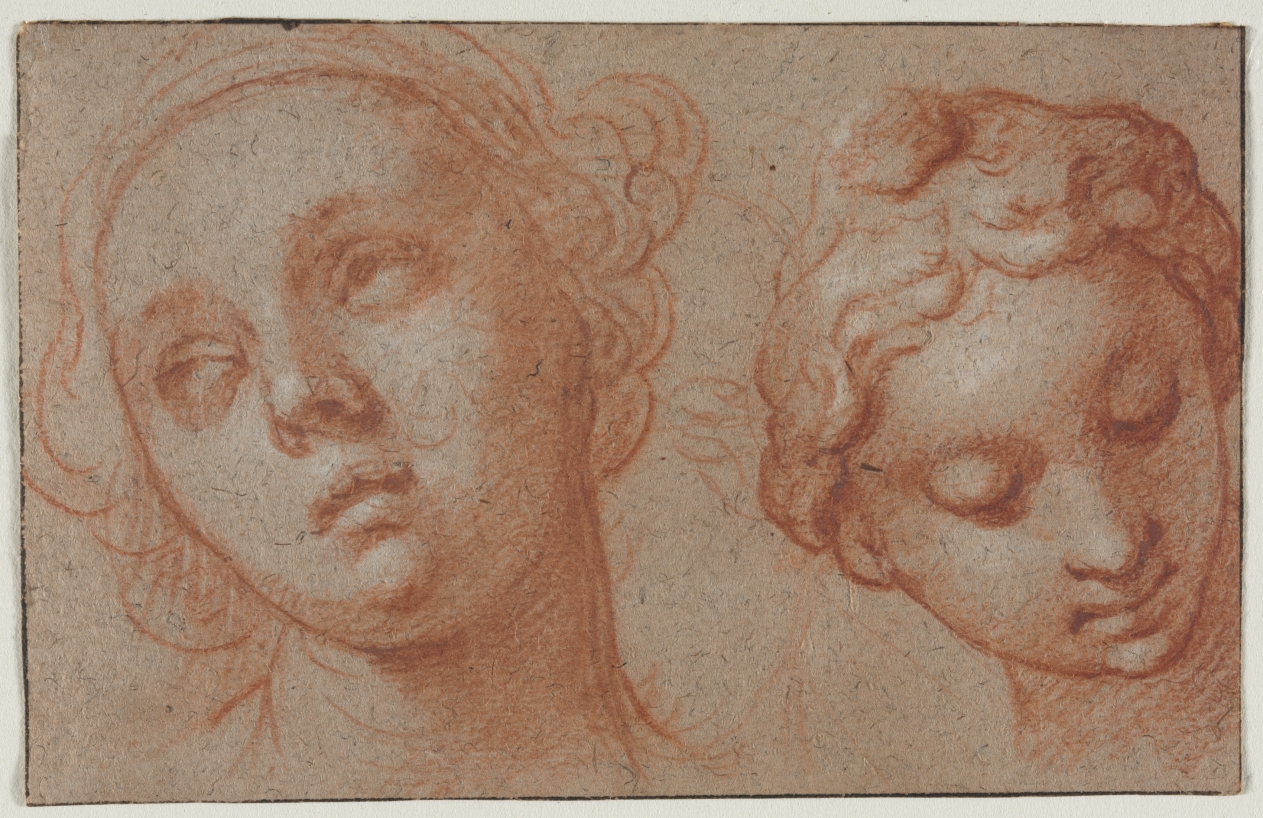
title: Two Female Heads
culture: Netherlands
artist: Abraham Bloemaert (Dutch, 1566–1651)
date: 1600–1650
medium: red chalk heightened with white chalk; framing lines in brown ink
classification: Drawing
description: The power and sensitivity of this small drawing depicting two views of the same female head far exceeds the sheet’s modest size.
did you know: These female heads drawn from two angles may have been studies for an instruction book for artists published by Bloemaert in the 1600s.